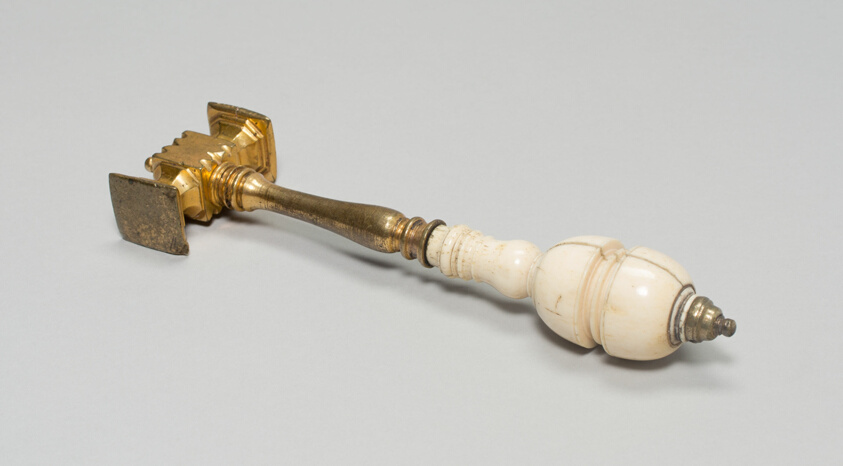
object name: Metalwork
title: Hammer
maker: France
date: 17th century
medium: Gilded bronze and ivory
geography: France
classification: tool; european decorative arts; metalwork